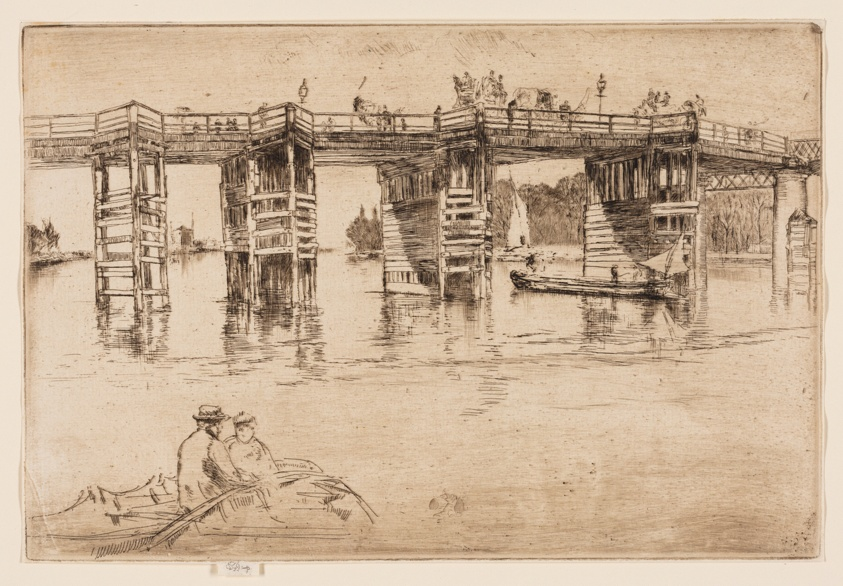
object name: Print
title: Old Putney Bridge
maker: James McNeill Whistler (American, 1834-1903)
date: 1879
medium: Etching and drypoint with foul biting in dark brown ink on ivory laid paper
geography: United States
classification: etching; drypoint; print; prints and drawing; foul biting; paper